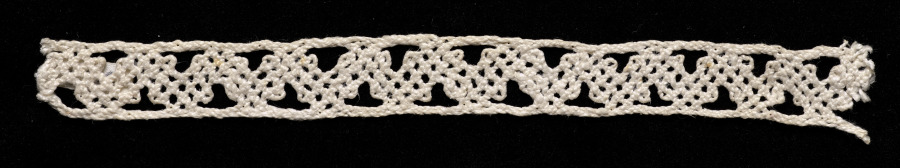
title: Lace Insertion with Selvage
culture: Italy, Venice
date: 1540–60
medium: Bobbin lace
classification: Lace